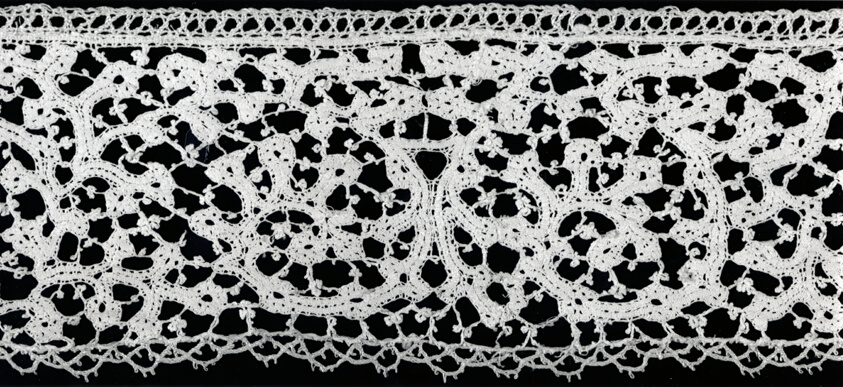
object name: Textile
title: Border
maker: Italy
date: Early 18th century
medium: Linen, bobbin part lace; continuous clothwork tapes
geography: Italy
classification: textile; lace - bobbin